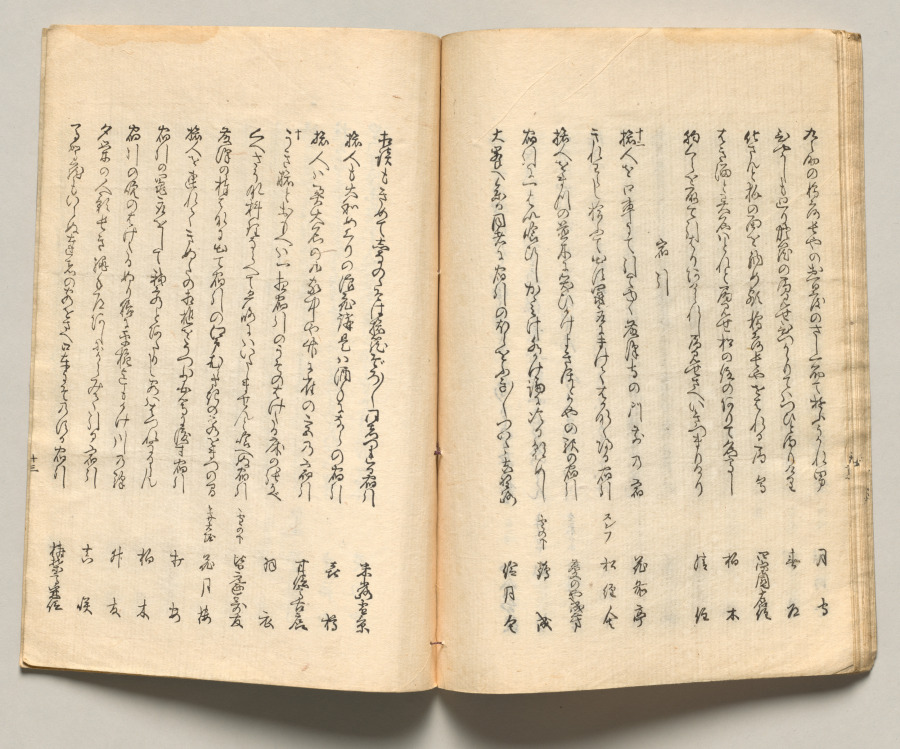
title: Spread Twenty from Volume Five of People of Japan in Light Verse (Kyōka)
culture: Japan, Edo period (1615–1868)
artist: Utagawa Hiroshige (Japanese, 1797–1858)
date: 1857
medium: Woodblock-printed book; ink and color on paper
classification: Bound Volume